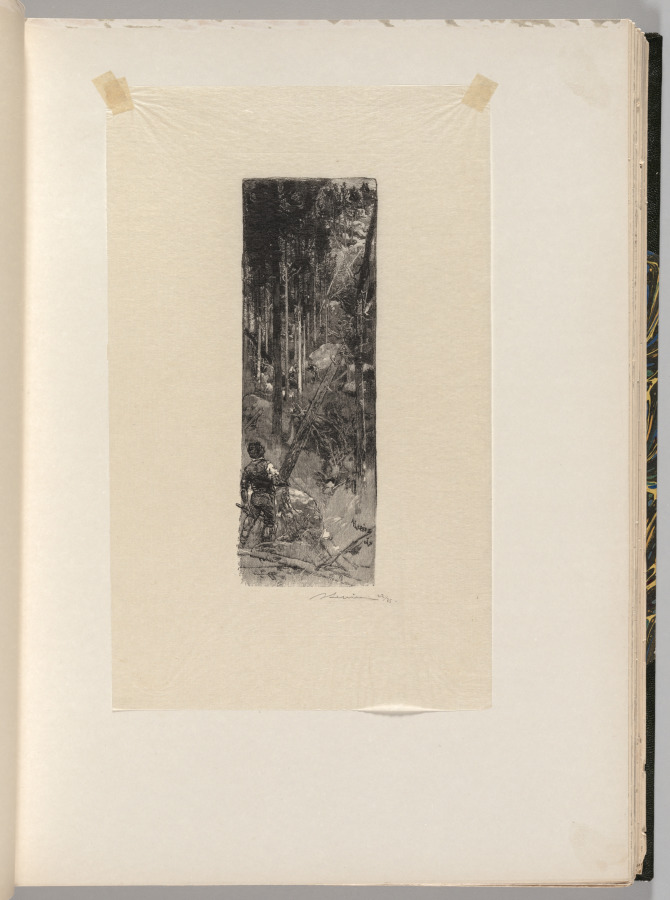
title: Fontainebleau Forest: Cutting of Pines (La Forêt de Fontainebleau: Abatage des pins)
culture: France, 19th century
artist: Auguste Louis Lepère (French, 1849–1918)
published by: A. Desmoulins, Published in Revue Illustrée, 1887–90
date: 1890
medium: wood engraving from bound volume of 34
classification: Bound Volume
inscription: Below image, lower right, in black ink: ALepère 22/35; in block, lower right: ALEPÈRE / De. Sc; on window mat, lower right, in graphite: Abatage des pins